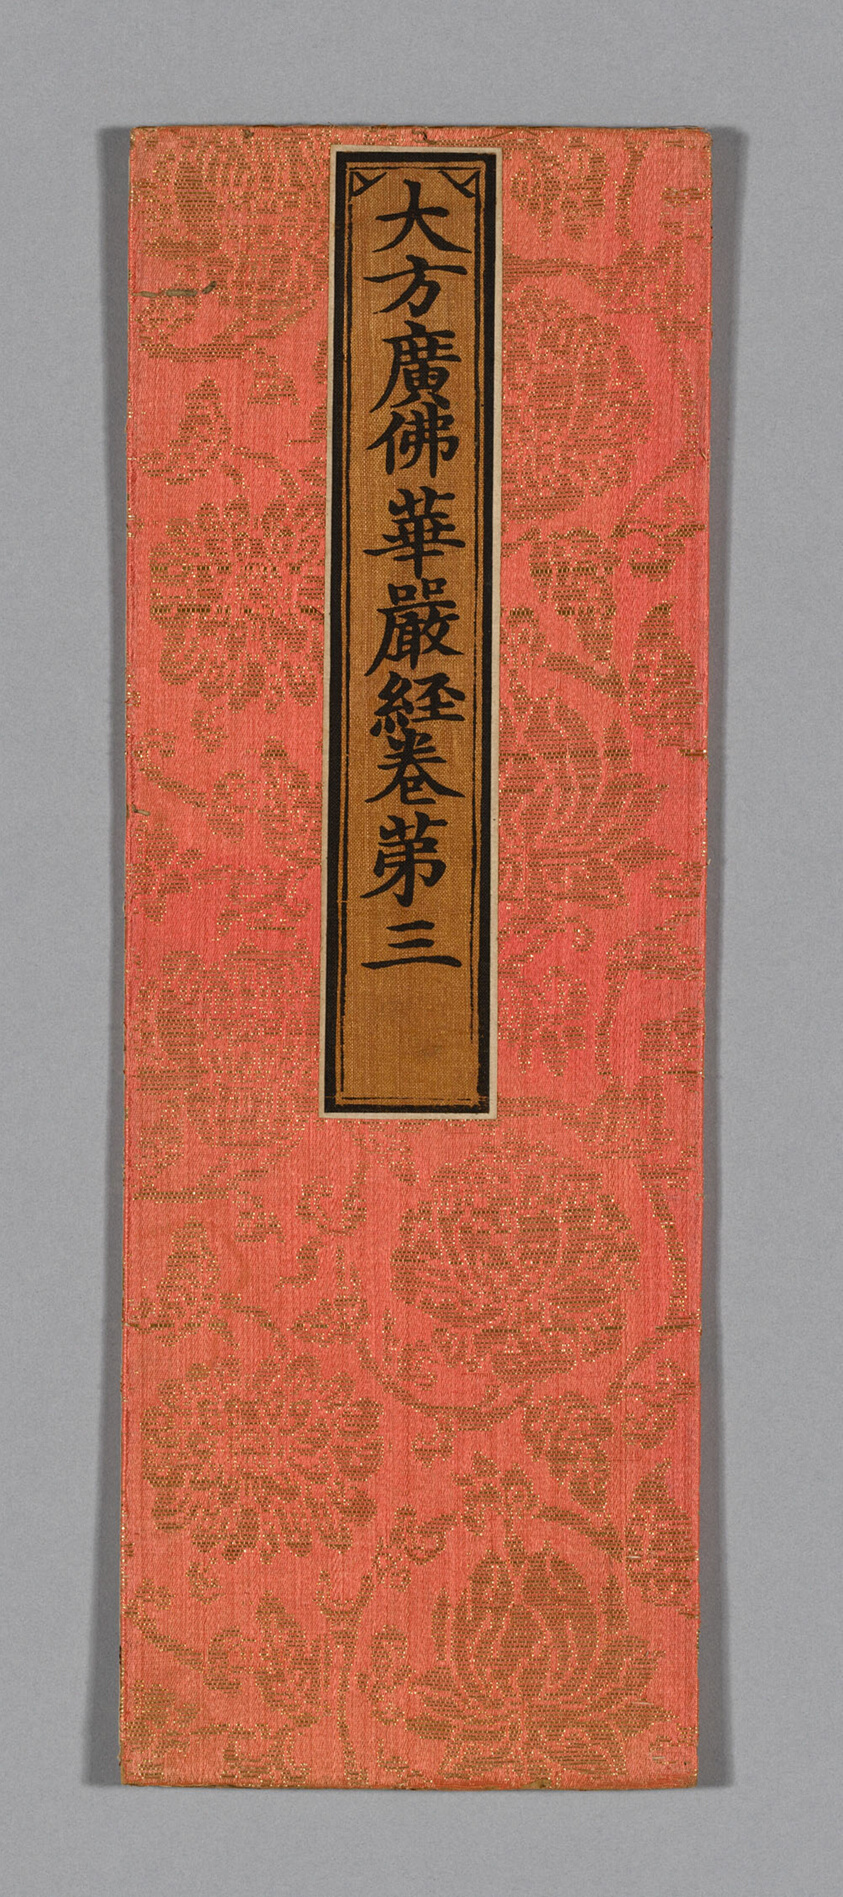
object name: Textile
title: Sutra Cover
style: ming, Chinese (culture or style), East Asian, asian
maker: China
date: Ming dynasty (1368–1644), c. 1590's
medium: Silk and gold-leaf-over-lacquered-paper strips, warp-float faced 4:1 satin weave with supplementary patterning wefts bound in weft-float faced 1:4 satin interlacings; label: silk, plain weave; painted in ink; glued over paper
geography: China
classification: textile; weaving